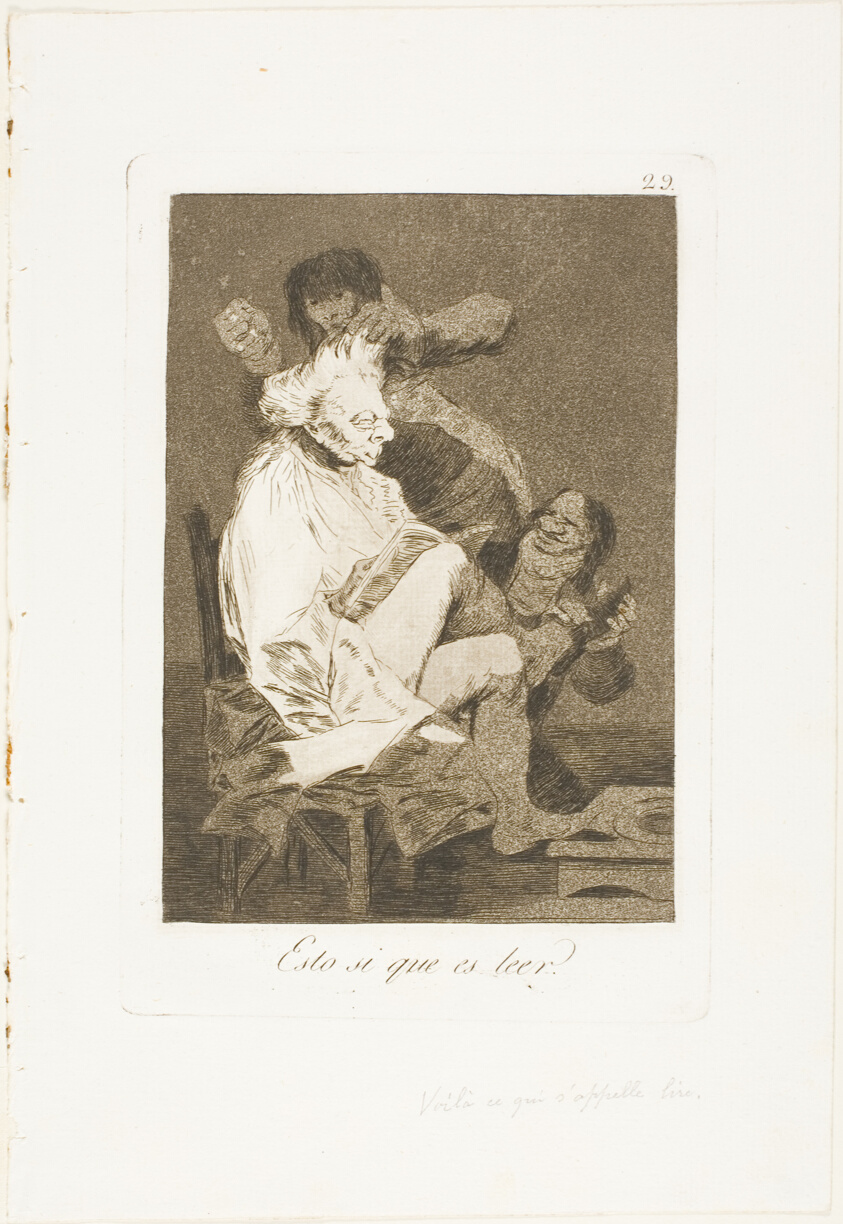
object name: Print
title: That certainly is being able to read, plate 29 from Los Caprichos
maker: Francisco José de Goya y Lucientes (Spanish, 1746-1828)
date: 1797/99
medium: Etching and aquatint on ivory laid paper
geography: Spain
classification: etching; print; prints and drawing